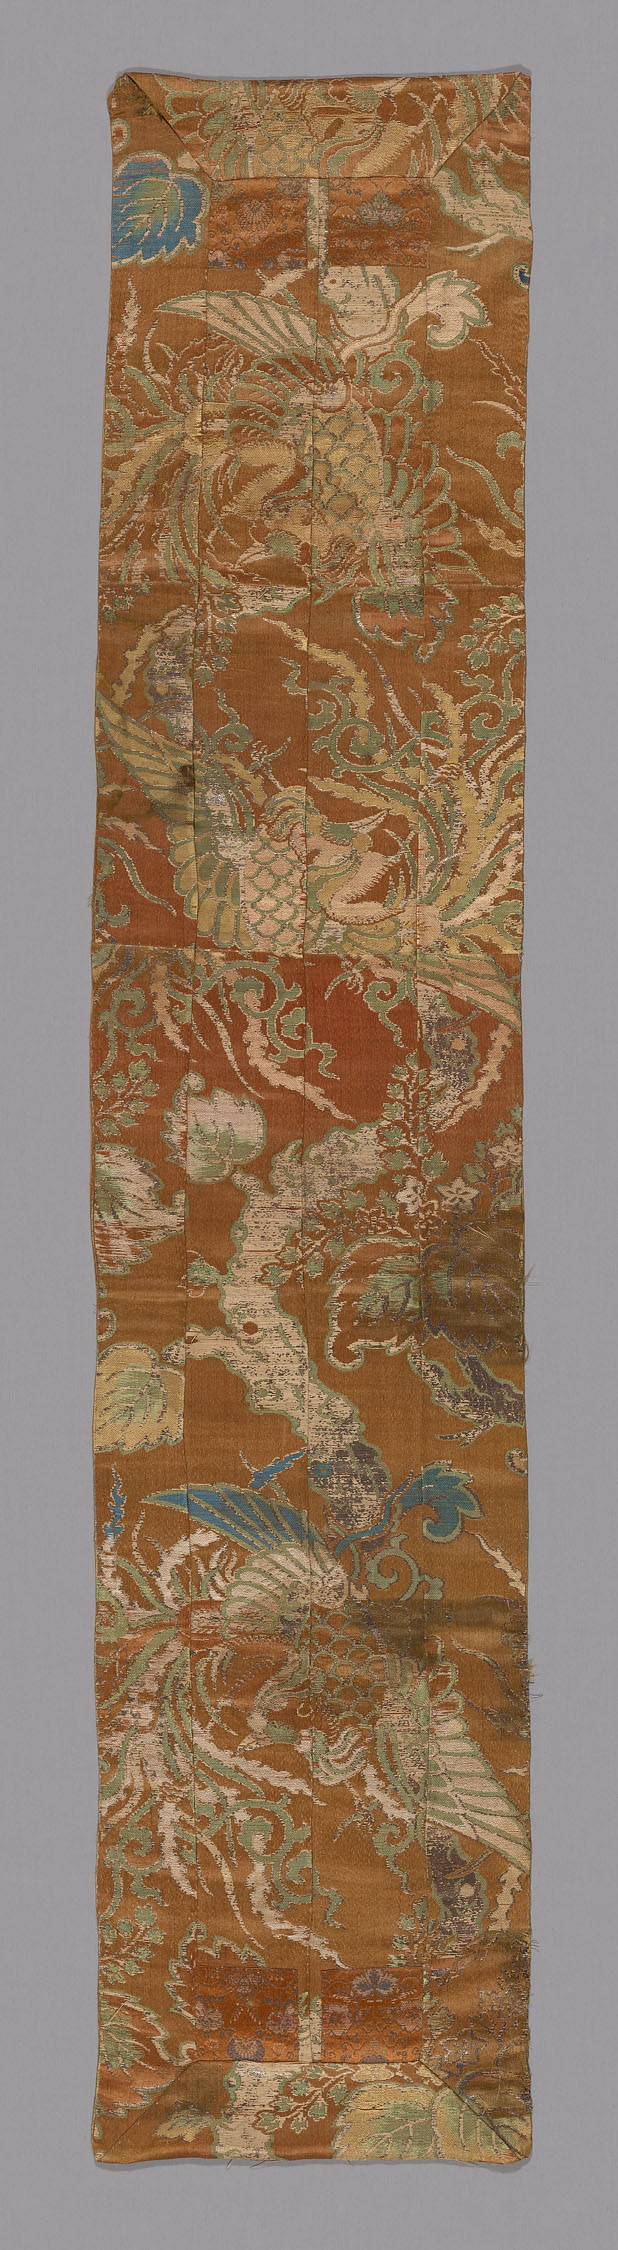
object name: Textile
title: Ôhi (Stole)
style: Japanism, late edo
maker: Japan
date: late Edo period (1789–1868), 1800/68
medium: Heri, jô: silk and gold-leaf-over-lacquered-paper-strip, warp-float faced 4:1 satin weave with weft-float faced 1:2 ‘Z’ twill interlacings of secondary binding warps and supplementary patterning wefts; shiten: Silk and silver-leaf-over-lacquered-paper-strip, warp-float faced 4:1 satin weave with weft-float faced 1:2 ‘S’ twill interlacings of secondary binding warps and supplementary patterning wefts; lining: silk, plain weave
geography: Japan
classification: textile; liturgical - buddhist; weaving